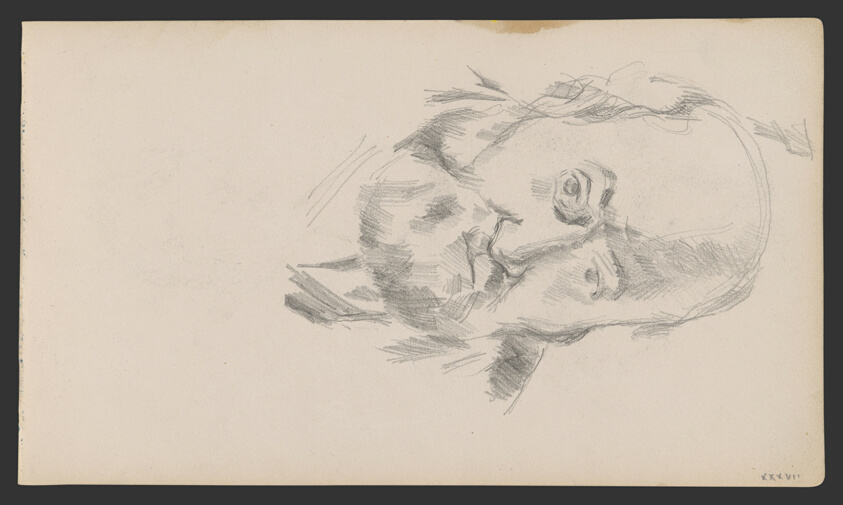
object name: Drawing and Watercolor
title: Sketchbook No. 2 (L'Estaque)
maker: Paul Cézanne; French, 1839-1906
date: 1875–86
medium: Graphite and pen and ink drawings on paper, bound into a book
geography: France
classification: sketchbook; graphite; prints and drawing; paper